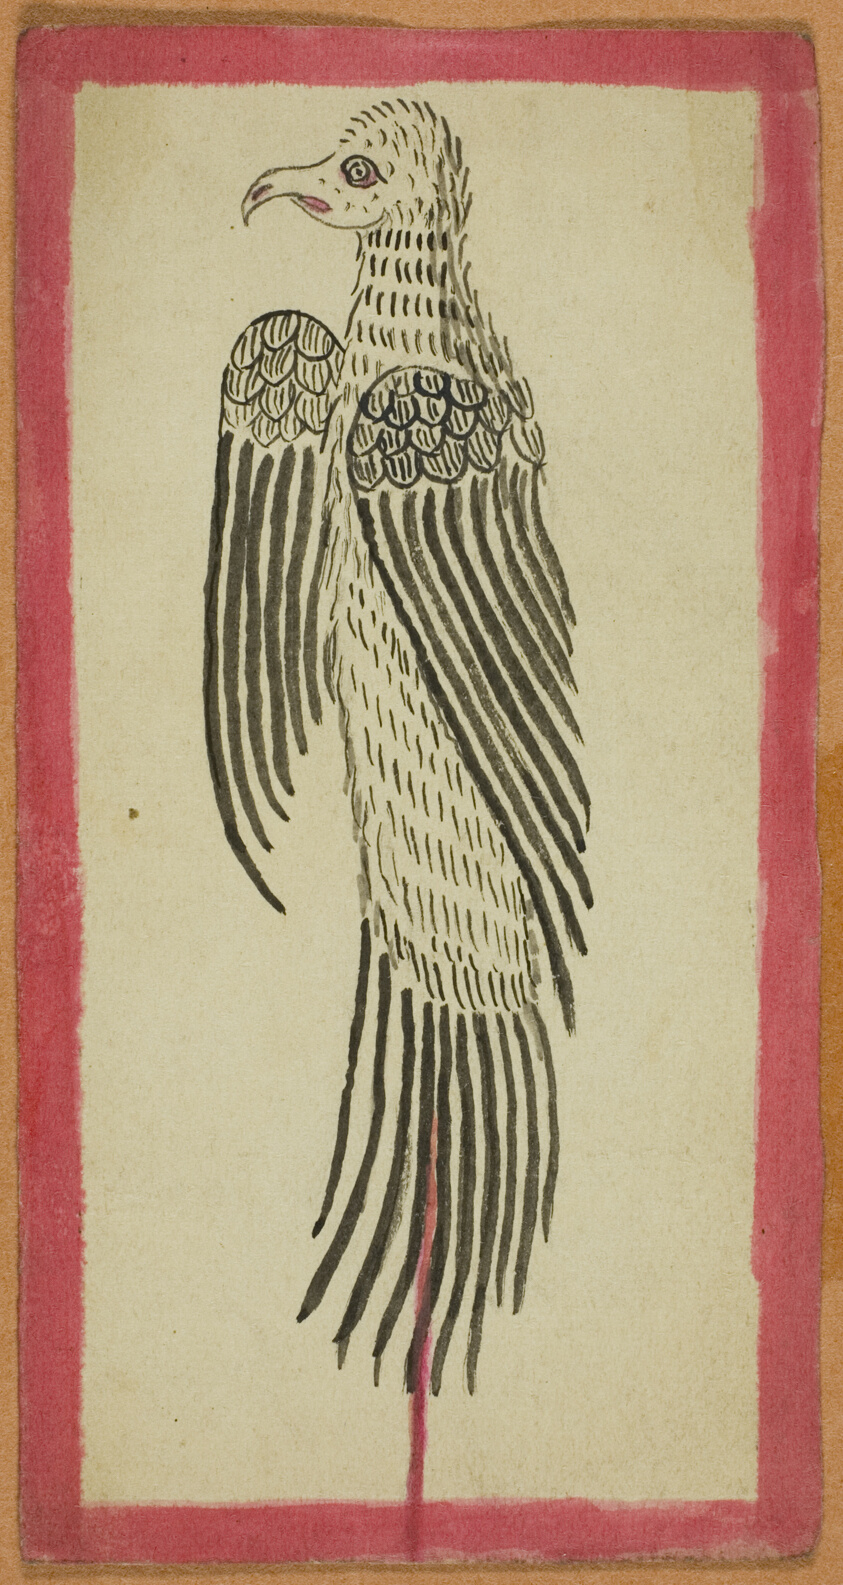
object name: Drawing and Watercolor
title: Sacrificed Animal from a Set of Four Ritual Cards (Tsakalis)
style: Himalayan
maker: Mongolia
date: 20th century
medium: Ink and porous point pen on wove paper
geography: Mongolia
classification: pen and ink drawings; manuscript; asian art